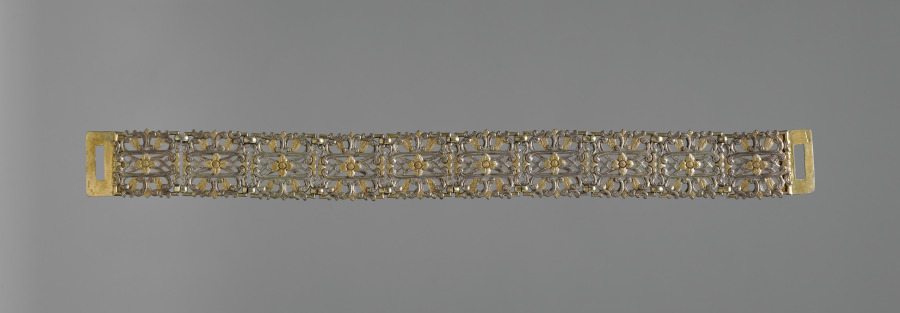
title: Woman's Costume (Metal Belt)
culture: Italy, Sicily, 19th century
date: 1800s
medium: metal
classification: Metalwork